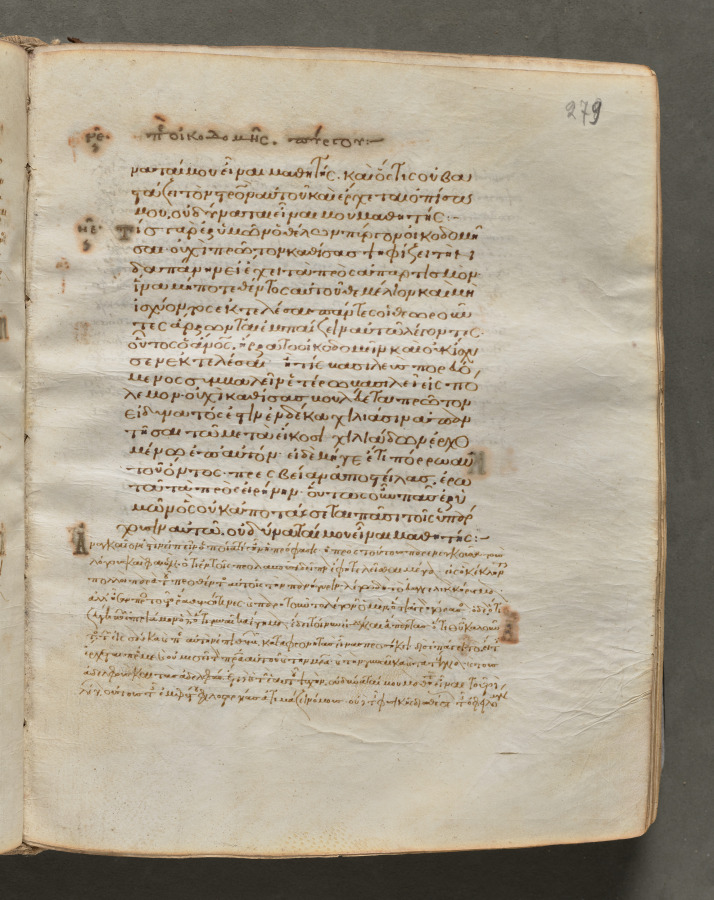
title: Text, folio 279 (recto), from a Gospel Book with Commentaries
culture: Byzantium, Constantinople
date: c. 1000–1100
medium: ink, tempera, and gold on vellum; leather binding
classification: Bound Volume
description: Each of the four gospels in this book opens on a page with brilliantly illuminated borders depicting the author of the text as well as birds—principally peacocks, symbols of the immortality of the soul—and fountains, representing the fountain of life and the salvation of the soul. This volume consists of 428 leaves with texts in Greek. Its level of sophistication suggests that it was probably written and decorated in a monastery in Constantinople.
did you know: Gospel books were carried in procession through Byzantine churches.